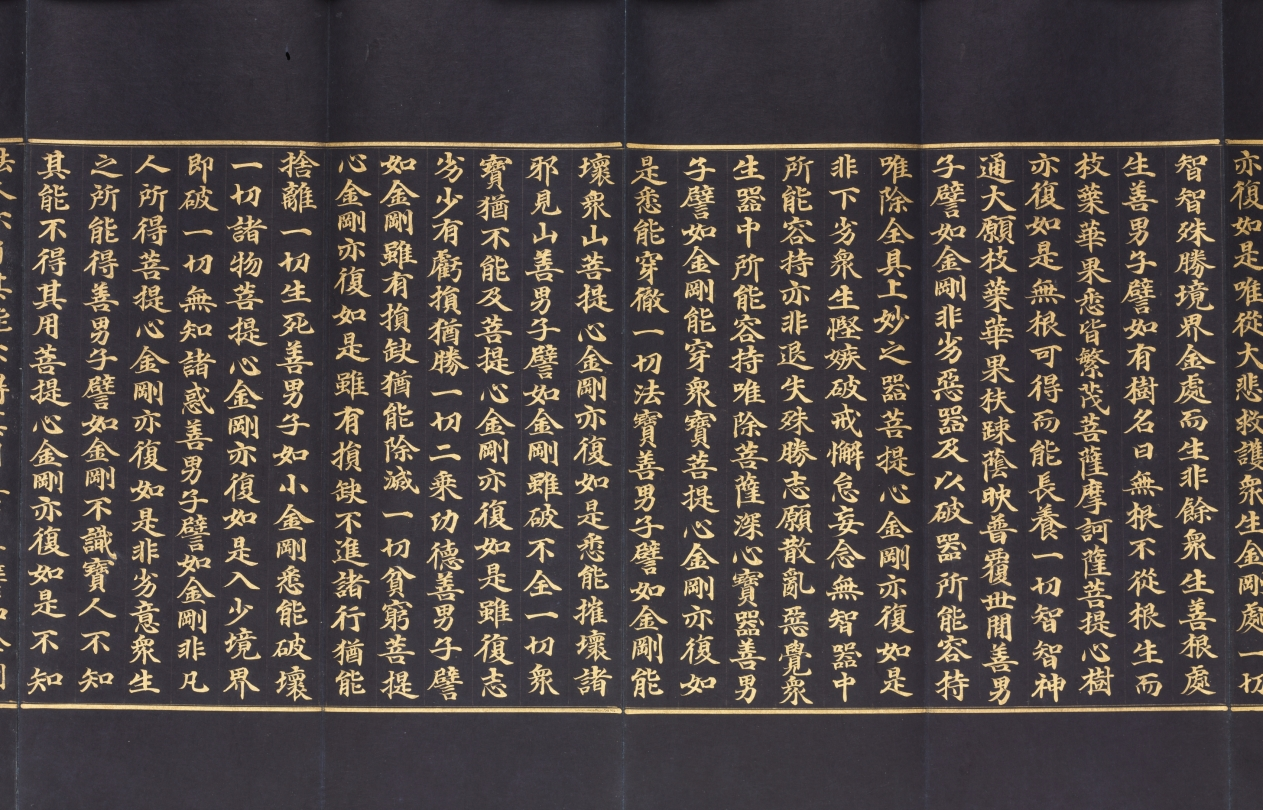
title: Avatamsaka Sutra No. 78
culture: Korea, Goryeo dynasty (918–1392)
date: 1300s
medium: Folded book with illustrated frontispiece; gold and silver on mulberry paper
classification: Bound Volume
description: This illuminated manuscript presents one part of the multivolume sacred text titled Avatamsaka (Flower Garland) sutra. Both the script and the image are rendered in gold ink on the smooth surface of the dark blue, indigo-dyed mulberry paper. This portion of the text, which reads from right to left, describes the encounter of the Buddha of the Future (Maitreya) and the young pilgrim Sudhana. The Buddha gives his words of wisdom to Sudhana, who asks questions about the path toward spiritual awakening. Mixed with ink and glue, the gold has a brilliance that strikingly reflects Sudhana’s ardent quest for understanding the way to reach enlightenment.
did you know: The pristine condition of this manuscript indicates that it was rarely used after its creation, revealing that the act of making a manuscript rather than reading it was the main religious goal.